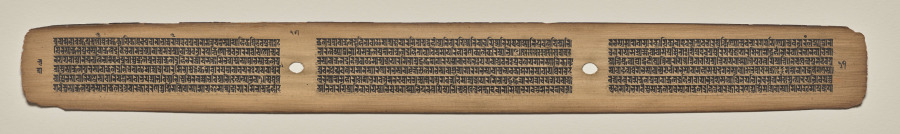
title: Text, Folio 17 (verso), from a Manuscript of the Perfection of Wisdom in Eight Thousand Lines (Ashtasahasrika Prajnaparamita-sutra)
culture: Eastern India, Bihar, Vikramashila Monastery. Painting: Nepal, Kathmandu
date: Sunday, September 14, 1119 (year 239 of the Newar Samvat in the month of Ashvina)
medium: gum tempera and ink on palm leaves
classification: Painting